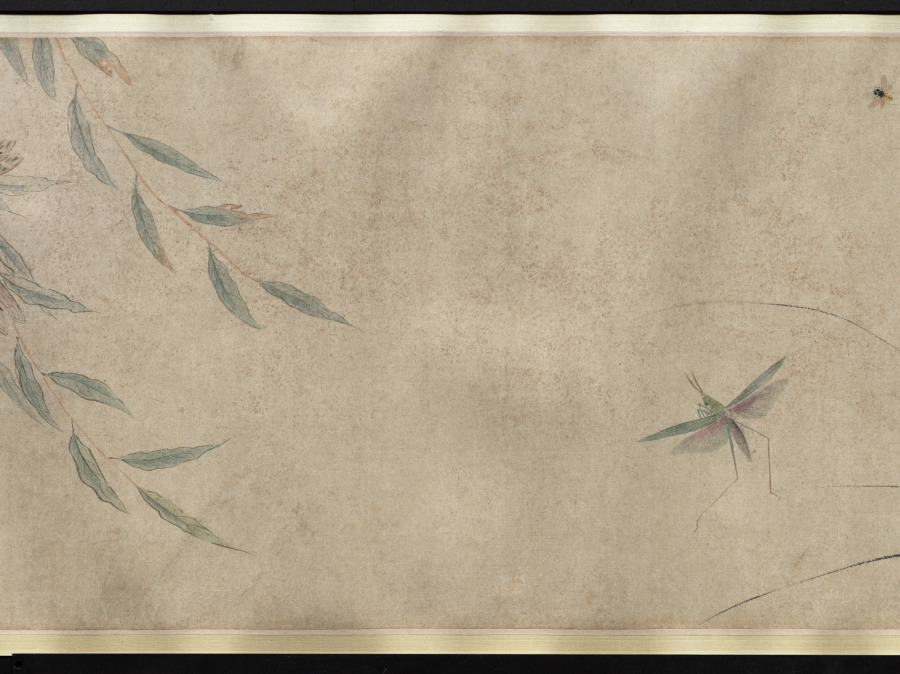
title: Insects and Flowers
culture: China, Qing dynasty (1644-1911) or Republican period (1912-49)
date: c. 1900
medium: Handscroll, ink and color on paper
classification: Painting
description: More than 26 feet long, this scroll presents insects, reptiles, and plants in delicate brushwork and pale colors, referring in style to earlier Southern Song dynasty (1127–1279) bird-and-flower paintings. Upon closer inspection, ants dismember a butterfly and reptiles wait to ambush their prey. An inscription at the end of the painting gives us an idea of its meaning: Attributed to the Qing dynasty scholar Zhang Xigeng (張錫庚, 1801–1861), the inscriber relates the work to an earlier painting by Qian Xuan (錢選, c. 1235–before 1307) and further suggests that the painting may allude to the relentlessness of natural selection. By drawing a parallel to tumultuous episodes in Chinese history, the writer might even hint at the domestic rebellions and the aggression of Western powers against China in his lifetime, particularly the Opium Wars (1839–60).